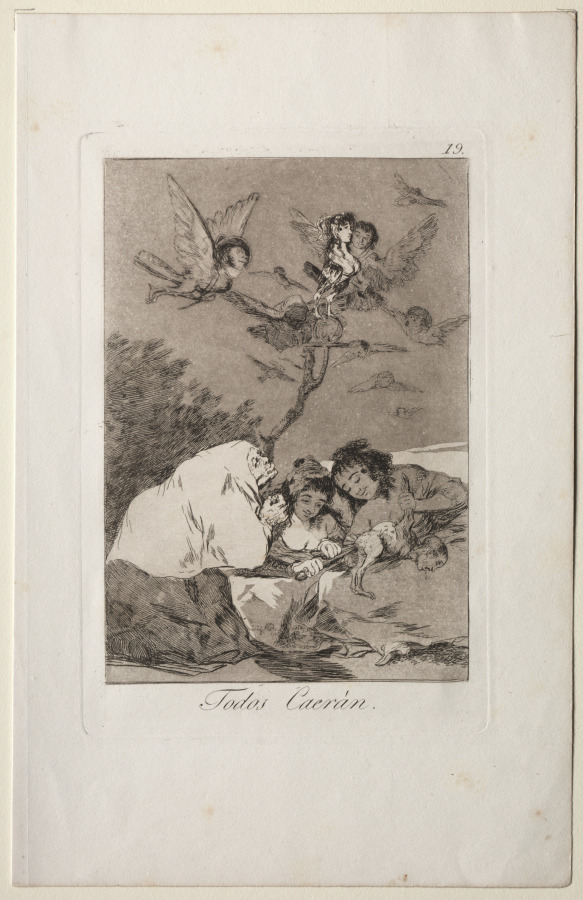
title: All Will Fall, Plate 19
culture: Spain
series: Los Caprichos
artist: Francisco de Goya (Spanish, 1746–1828)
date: 1799 (printed c. 1855)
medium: etching and aquatint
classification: Print